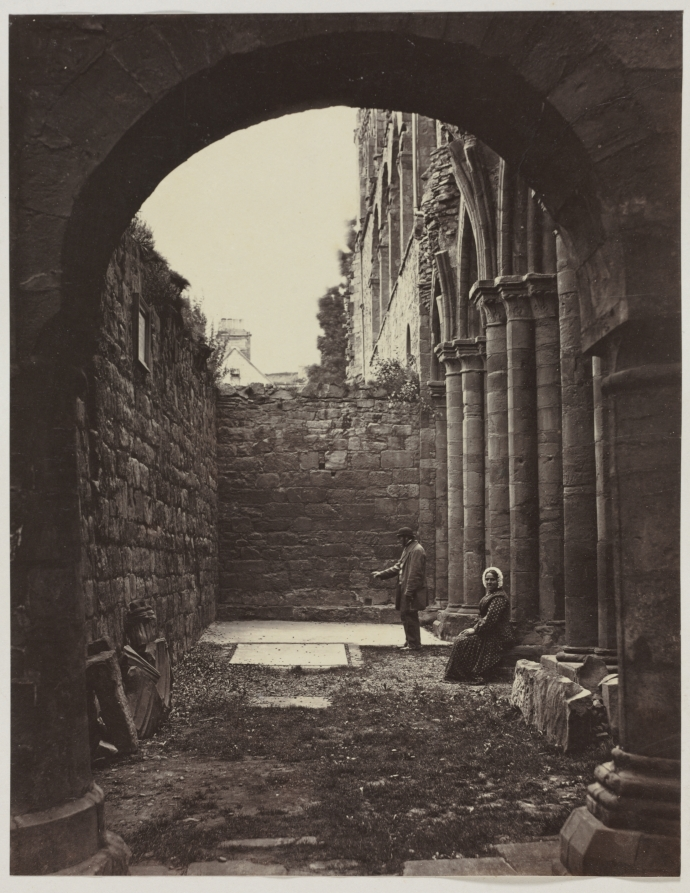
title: L.D. Campbell's Tomb (verso)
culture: England, 19th century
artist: John Hamilton Craigie (British)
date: c. 1861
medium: albumen print from wet collodion negative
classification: Photograph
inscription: Written in pencil on recto: "L.D. Campbell's Tomb / J.H. Craigie"